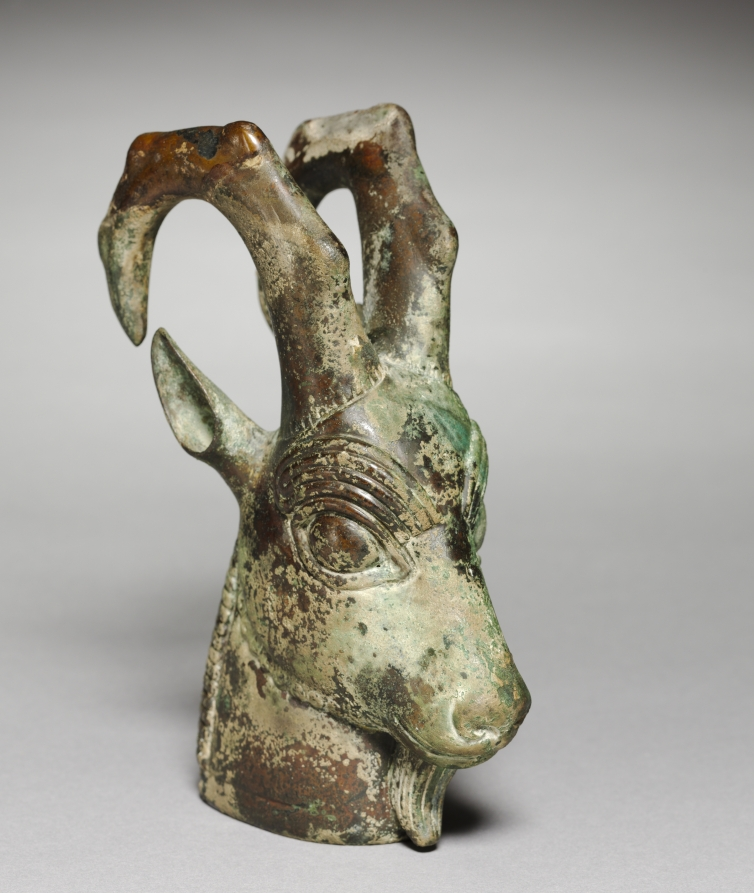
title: Ibex-Head Ornament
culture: Iran, Achaemenid (550–330 BCE)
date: c. 525–450 BCE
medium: bronze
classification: Sculpture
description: This may have decorated an ornate piece of furniture or a huge and heavily embellished bronze cauldron similar to that which the nearby bronze bull head once adorned.